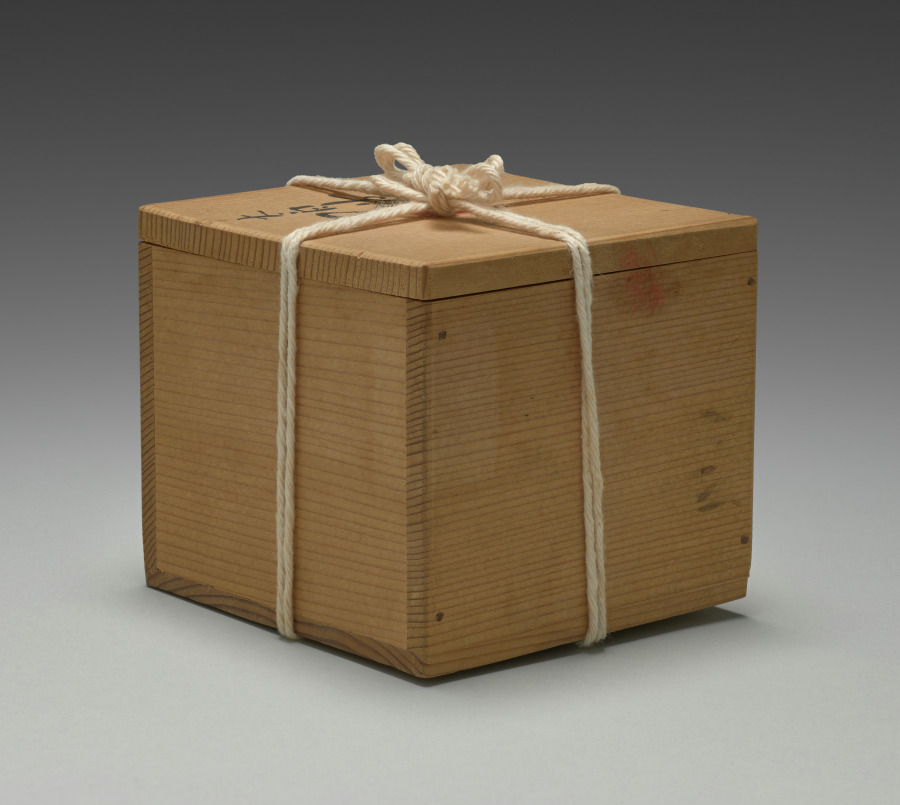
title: Hand-held Teapot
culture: Japan, Meiji period (1868–1912)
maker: Seifū Yohei III (Japanese, 1851–1914)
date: 1893–1914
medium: Porcelain with molded and carved design and cream glaze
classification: Ceramic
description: This teapot is of a variety used by advanced sencha practitioners. Called a hōhin, the pot is designed to be held directly by the fingers, with the body touching the upper part of the palm. This shape allows the host to manipulate the pot with a single hand and demonstrate dexterity. Direct contact between the ceramic body and the hand allows the host to closely gauge the temperature of the water within. There are differing grades of sencha, and for the finest one, gyokuro, the water temperature must be carefully regulated to achieve the proper flavor. This vessel is therefore efficacious for preparing this high-quality tea. The hōhin is also extremely portable, so it is well suited for impromptu gatherings. According to its box, this teapot is an example of taihakuji. “Great-white porcelain” was an important early invention Yohei III devised in 1972. It involved the combination of a distinctive translucent, creamy glaze over an ivory-colored clay body.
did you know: This pot’s restrained design includes on the lid’s handle a yin-yang motif, symbolizing the ideal balance between the forces of the universe.